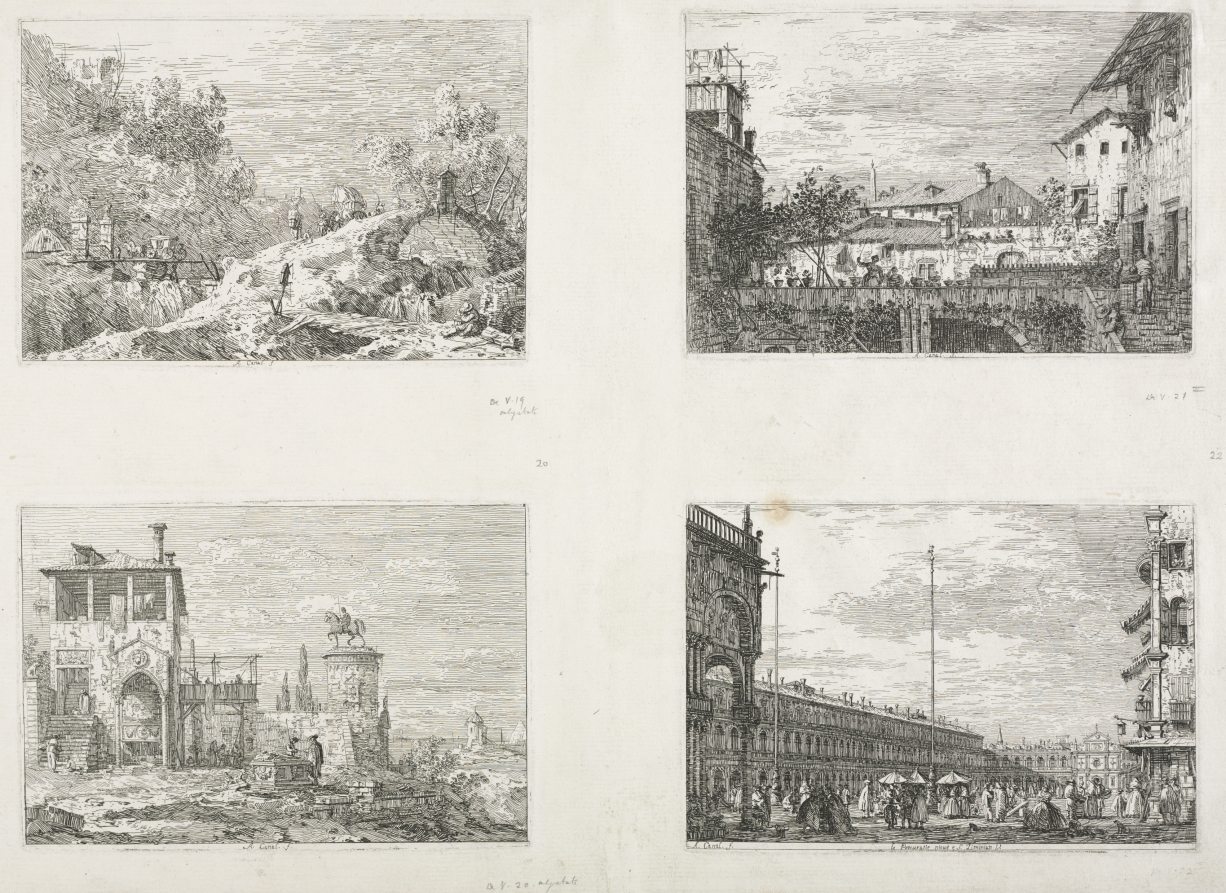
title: Views: The Procurator's Palace and the Church of St. Géminien, Venice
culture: Italy, Venice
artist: Antonio Canaletto (Italian, 1697–1768)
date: 1735–1746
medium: etching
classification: Print